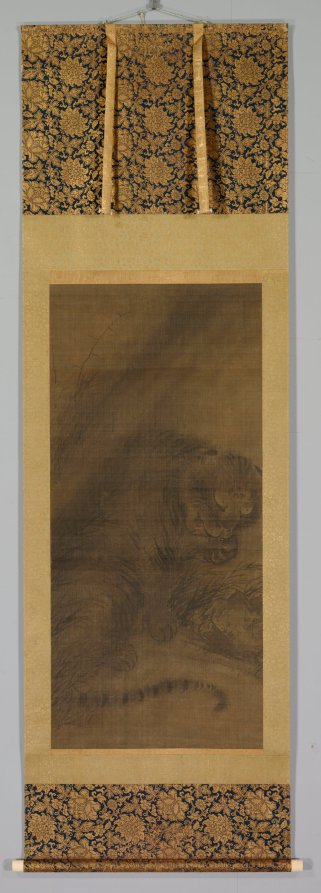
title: Tiger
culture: China, Southern Song dynasty (1127-1279)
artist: Fachang Muqi (Chinese, 1220–1280)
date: c. 1250–79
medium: Hanging scroll; ink and slight color on silk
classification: Painting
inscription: 道有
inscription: 雜華室印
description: The dragon and tiger are tied to the philosophical concept of yin and yang, which describes opposite but complementary forces. The dragon occupies a tiered background of waves and mist. Its luminous head emerges from the darker passages, and its narrow twisting body is serpent-like. By contrast, the close-up view of the tiger emphasizes its bulk. The tiger bends its head to lick its paw while its tail curls in the foreground. In their original Chan Buddhist context, this pair of scrolls likely flanked a central image, like the Bodhisattva Guanyin. The silk has darkened over the centuries, and the slight reddish shading in the tiger’s tongue and nose has faded.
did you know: Fachang Muqi's ink paintings, like this pair, were highly appreciated and collected in Japan.